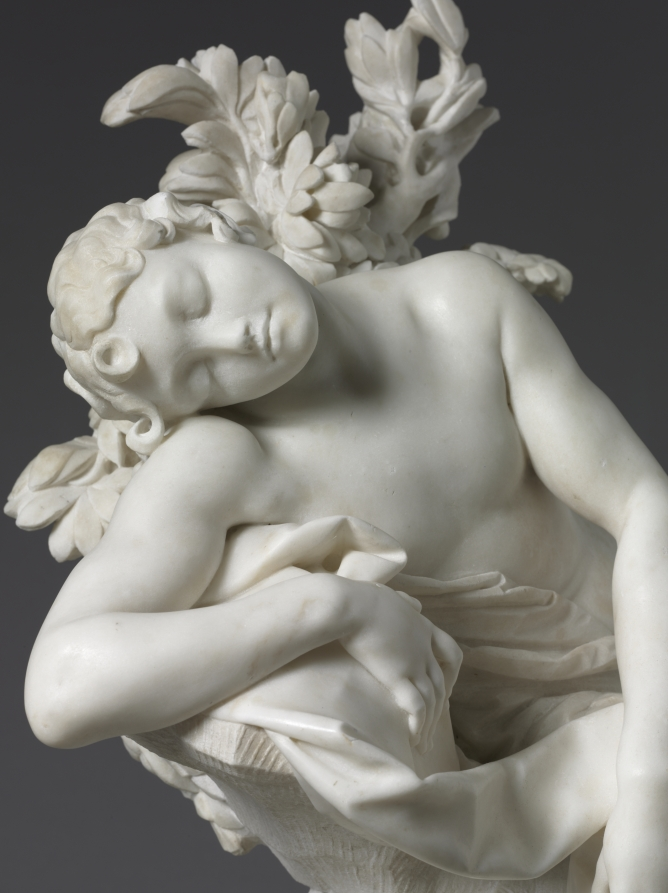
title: Sleeping Endymion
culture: Italy, 18th century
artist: Agostino Cornacchini (Italian, 1686–1754)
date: 1716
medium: marble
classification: Sculpture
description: Cornacchini moved away from the dramatic movement and light effects characteristic of baroque sculpture toward a calmer, gentler, more graceful style favored by 18th-century taste. This sculpture depicts Endymion, a beautiful young shepherd from Greek mythology. His beauty so entranced Selene, the personification of the moon, that she asked Zeus to grant Endymion immortality. Zeus did so, but only after placing Endymion in an eternal sleep.